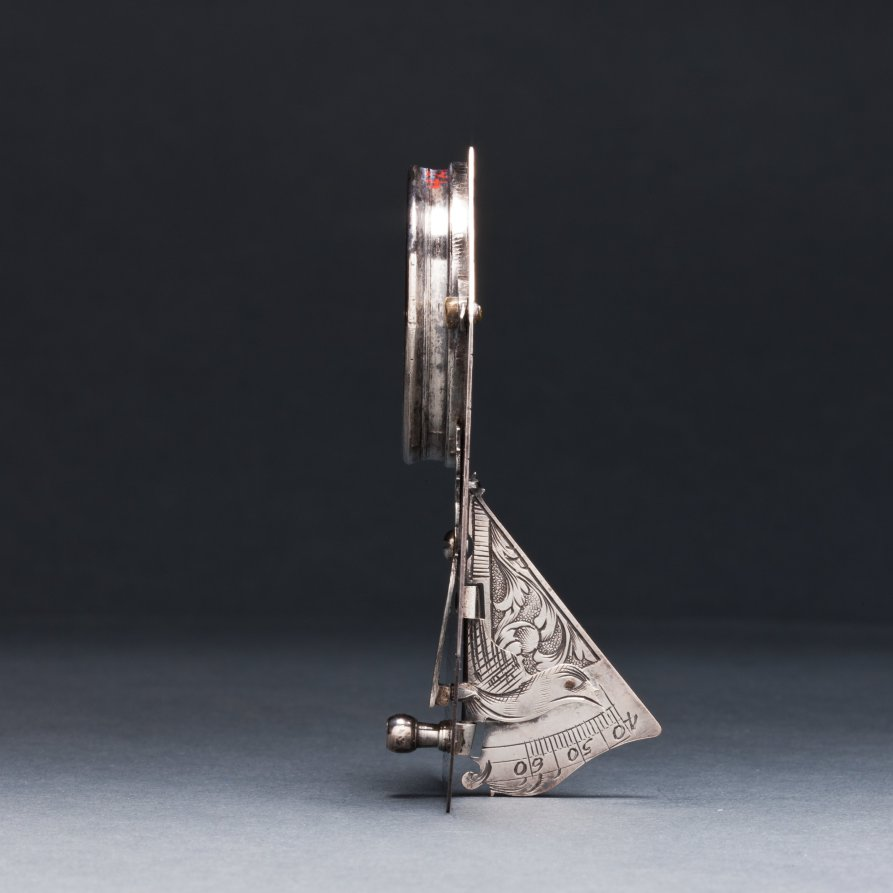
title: Butterfield Sundial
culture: France, 18th century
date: 1700s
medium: silver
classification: Silver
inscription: [Engraved signature above the compass in ribbon band]: "N. BION A Paris"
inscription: [Engraved on the face of the sundial]: “Pour 55° 4-5-6-7-8-9-10-11 50° IIII-V-VI-VII-VIII-IX-X-XI 45° 5-6-7-8-9-10-11 40° -VI-VII-VIII-IX-X-XI'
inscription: [Engraved on the other side]: "Pour 55° -8-7-6-5-4-3-2-1-0 50°-VIII-VII-VI-V-IIII-III-II-I 45°-8-7-6-5-4-3-2-1 40°-VII-VI-V-IIII-III-II-I"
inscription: [Engraved around the compass]: “NORD-OUEST-SUD-EST”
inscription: [Engraved on the back of the sundial]: “Turin 44 Milan 46 Paris 49 Lion 46 Metz 49 Rome 42 Liege 51 Naples 44 Namur 50 Gennes 44 Marseille 43 Grenoble 45 Bayonne 43 Bruxelle 51 Londres 52 Nantes 47 Vienne 48 Toulon 43 Tours 47 Lille 51”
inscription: [Engraved around the back of the compass]: “Venise 45 Strasbourg 49 Amsterdam 52 Hambourg 54 Varsovie 52 La Rochelle 46”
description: Butterfield-type sundials are characterized by their adjustable gnomons, metal flaps that cast a shadow on the dial’s face to indicate the hour, and geographical indices. This sundial has a scale adjustable between latitudes of 40° to 60° north. The latitudes of 26 European towns are engraved on its back for quick reference. With an intricately engraved silver face, it would have functioned as a fashionable traveler’s accessory.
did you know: Butterfield-style sundials were named after Micheal Butterfield, an English scientific and mathematical instrument maker who worked in Paris between 1674 and 1724.